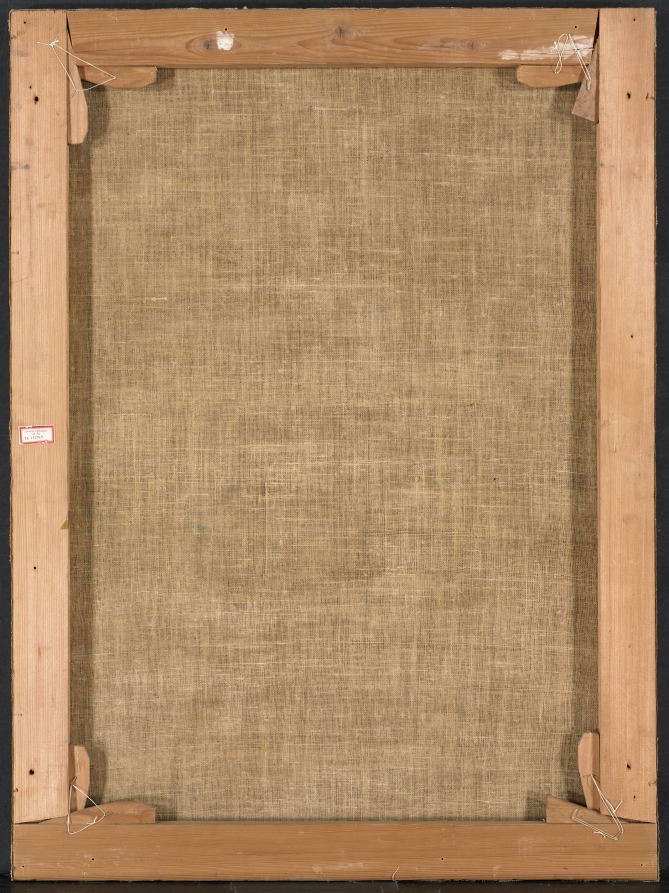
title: Portrait of a Man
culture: Italy, 17th century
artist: Tanzio da Varallo (Italian, c. 1575/80–1635)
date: c. 1620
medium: oil on canvas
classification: Painting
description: This portrait of an unknown man includes a detailed representation of a rapier, a sword worn with civilian dress and used in duels. On the basis of style, the rapier in this painting belonged to a distinctive group of sword hilts decorated between about 1570 and 1600. It was probably made in northern Italy.The son of a Piedmontese architect, Tanzio spent most of his life in northern Italy, but worked briefly in Rome and southern Italy, mainly Naples. These trips brought him under the influence of Caravaggio, whose dramatic realism Tanzio integrated into his own elegant, decorative style.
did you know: Dashing accessories enliven this portrait, including a rapier with an elegantly spiraling guard, produced exclusively in North Italy between 1570 and 1600.